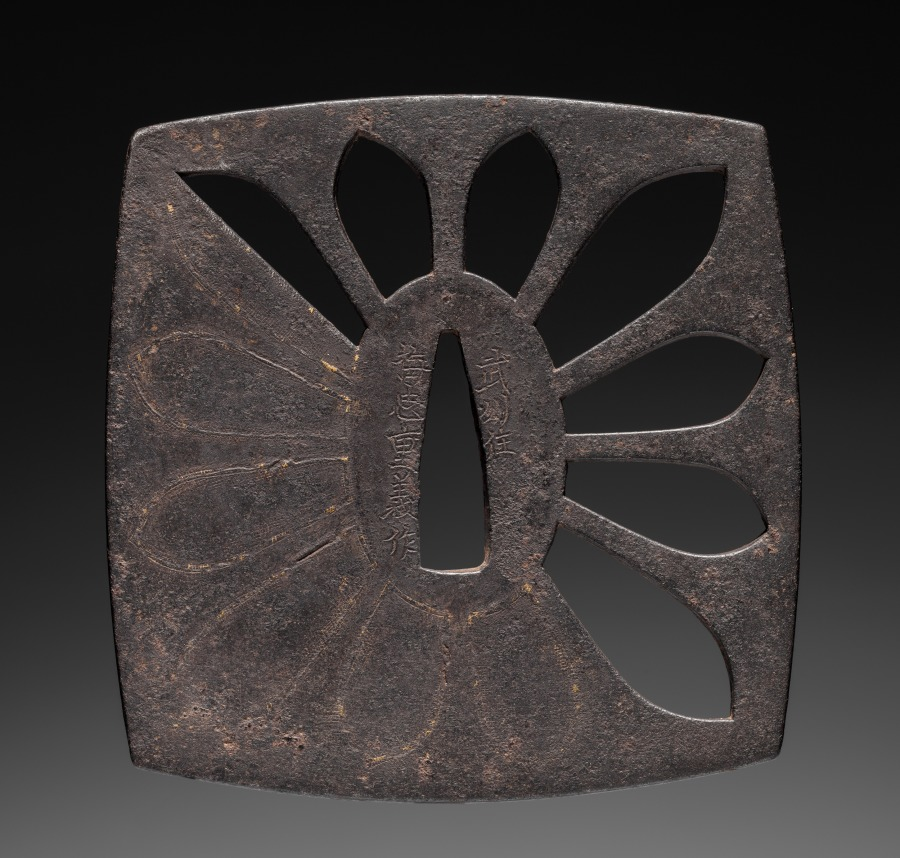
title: Sword Guard (Tsuba)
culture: Japan, possibly Edo period (1615-1868)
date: c. 1615–1868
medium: iron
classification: Arms and Armor